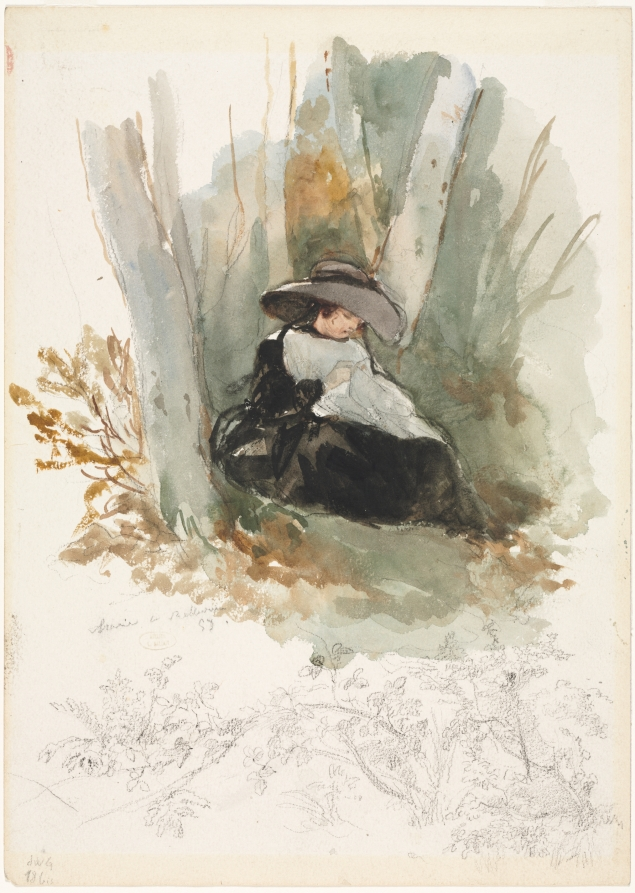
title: Marie à Bellevue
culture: Belgium, 19th century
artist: Louis-Joseph Gallait (Belgian, 1810–1887)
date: 1858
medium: watercolor and graphite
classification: Drawing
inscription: inscribed in graphite, left: Marie à Bellevue (recto) Bears inscription in black ink on verso: "Par / Louis Gallait 1810-1887 / Marie à Bellevue en 1858 / sa / fille qui épousa Charles Fouder [sic]"